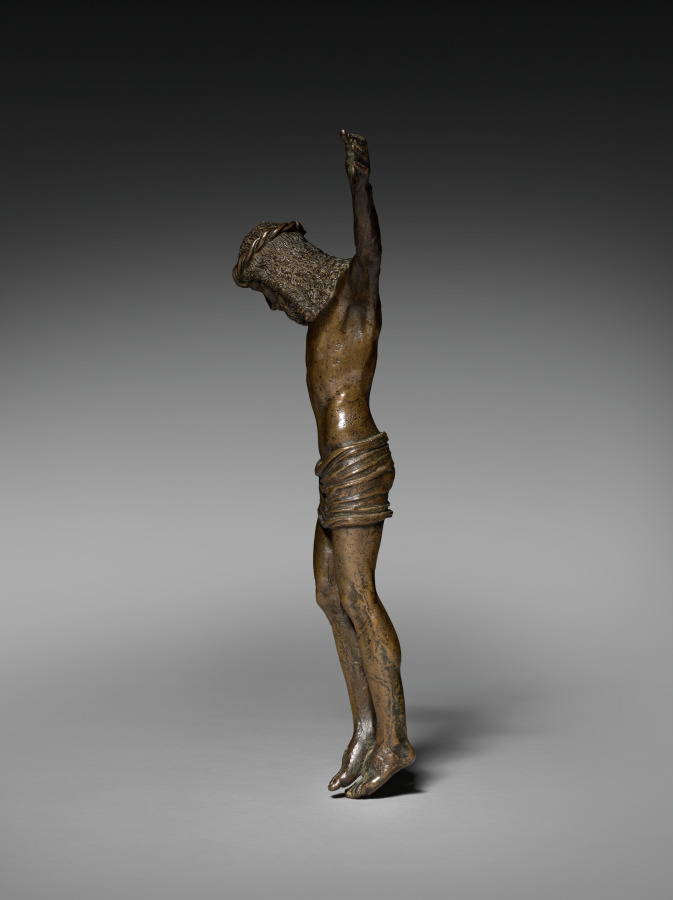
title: Crucified Christ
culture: Italy, Ravenna, 16th century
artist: Severo da Ravenna (Italian, c.1496–c.1543)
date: c. 1500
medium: bronze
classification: Sculpture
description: The highly finished surface of this sculpture, including the back, suggests it belonged to a refined collector. Small sculptures would often be held to admire details such as the strands of hair streaming onto Christ’s shoulders, the prominent veins in his forearms, and the intricate knotted cloth at his side.